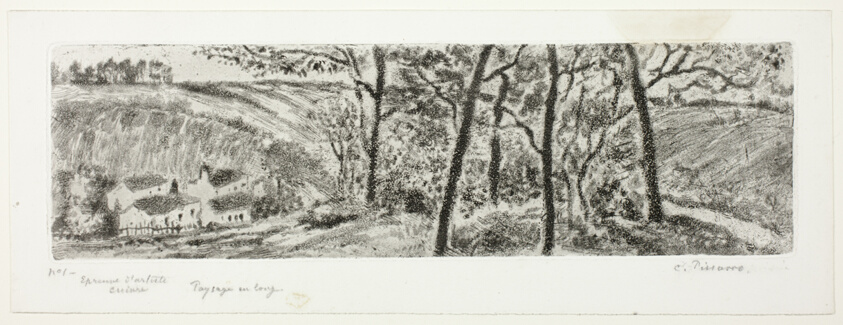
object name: Print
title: Landscape Panorama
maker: Camille Pissarro (French, 1830-1903)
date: 1879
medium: Etching and aquatint in black on white wove paper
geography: France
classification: aquatint; print; prints and drawing